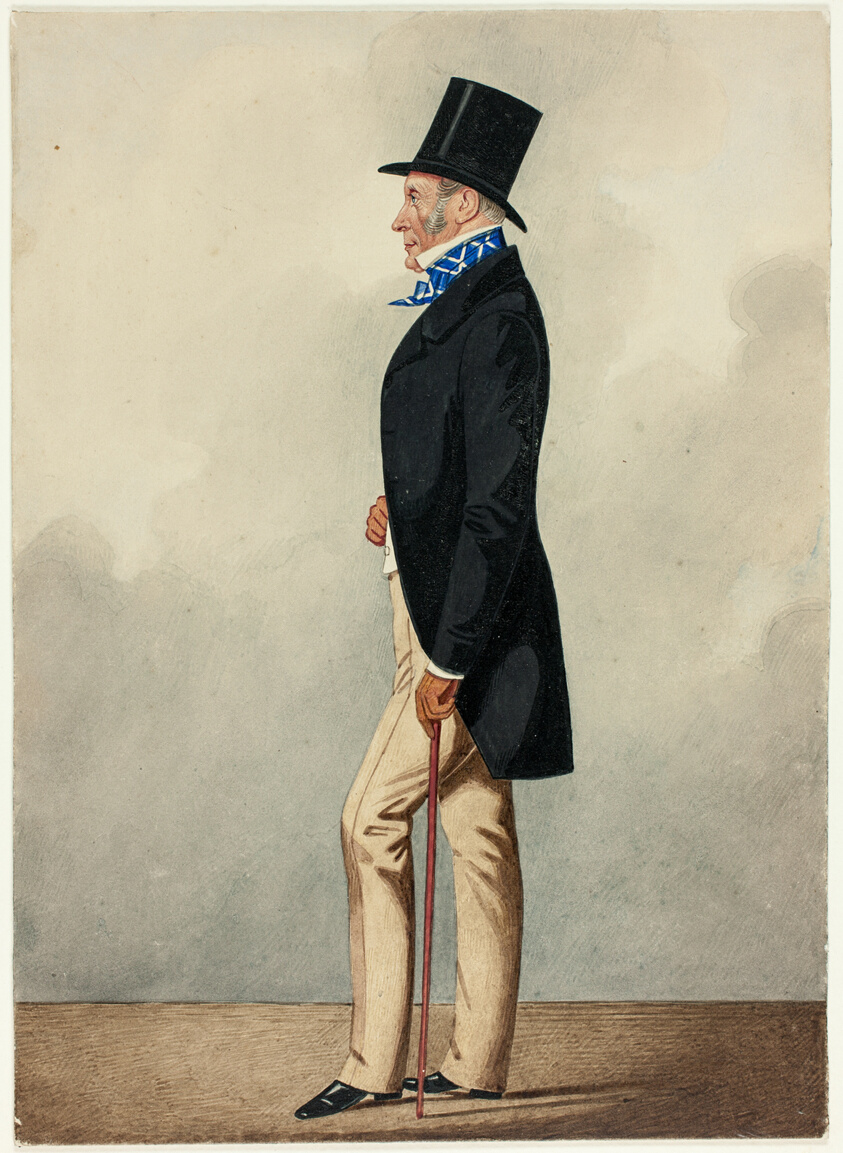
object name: Drawing and Watercolor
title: Portrait of Man in Black Coat and Blue and White Cravat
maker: Richard Dighton (English, 1795-1880)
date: 1835/40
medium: Watercolor and gouache, selectively varnished, on cream board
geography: England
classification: watercolor; drawings (visual works); prints and drawing